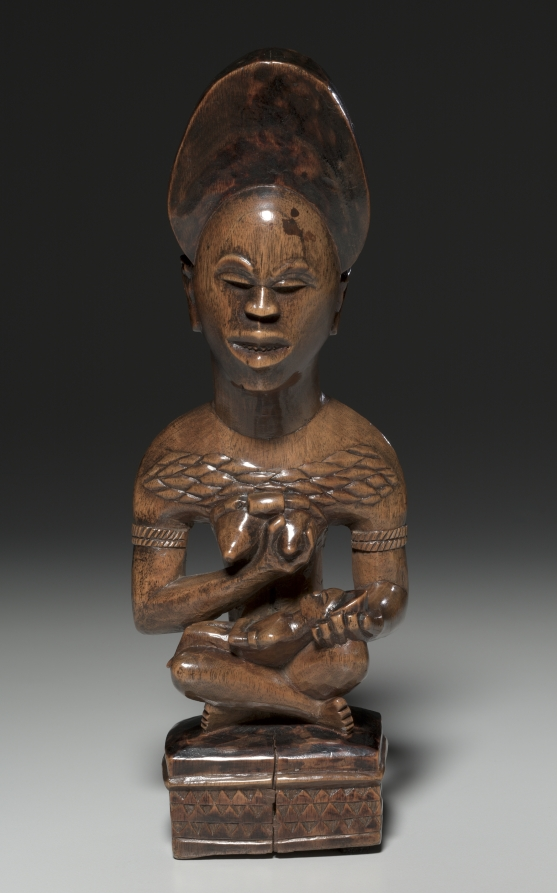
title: Woman and Child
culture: Africa, Central Africa, Democratic Republic of Congo, Yombe-style carver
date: mid- to late 1800s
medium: Wood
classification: Sculpture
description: This mother-and-child figure was probably part of a cult concerned with the treatment of infertility. Both her jewelry and her seated pose indicate that the woman occupied a high rank in her community. Her miter-shaped hairstyle, chiseled teeth, and raised body scars--considered to be marks of beauty and perfection--signal that the woman incarnates the founding ancestor of a kinship group.